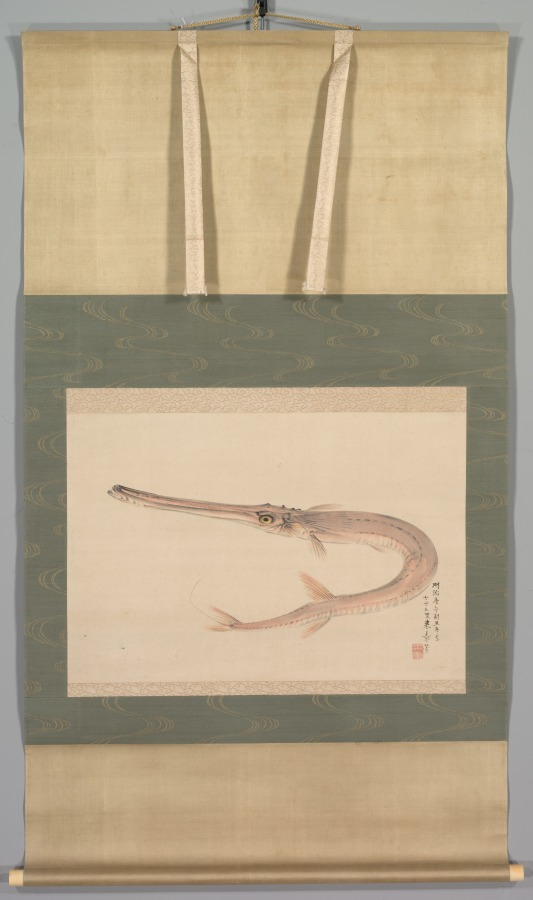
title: Needlefish (Yagara)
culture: Japan, Edo period (1615–1868)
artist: Nakajima Raishō (Japanese, 1796–1871)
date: 1870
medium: hanging scroll; ink and color on paper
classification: Painting